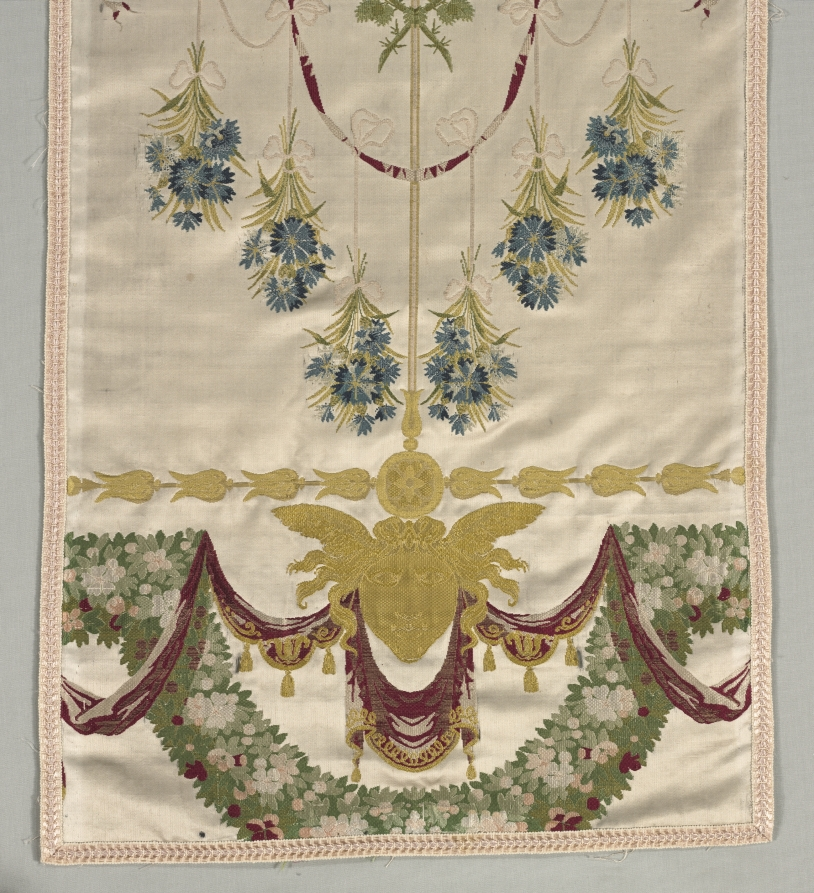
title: Wall Covering, "The Pheasants" from the "Vatican Verdures" Series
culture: France, 18th century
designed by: Jean-Démosthène Dugourc (French, 1749–1825)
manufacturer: Camille Pernon & Cie (French)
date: after 1799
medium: lampas (satin weave and plain weave variant), brocaded, embroidered (chain, satin stitches); silk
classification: Textile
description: France developed a thriving silk industry in Lyon with the goal of becoming the fashion center of Europe. Employment soared to some 20,000 workers by the time of the French Revolution in 1789. Designs changed annually, colors established new fashions, and spectacular silks were produced during the late 1700s. Dugourc, an architect who studied in Italy, became a renowned textile designer for Camille Pernon & Cie, purveyors to King Louis XVI (reigned 1774–92). He created this elaborate, balanced composition as part of elegant wall coverings for the Casita del Labrador, near Madrid. Dugourc named the series after frescos by Raphael in the Vatican.